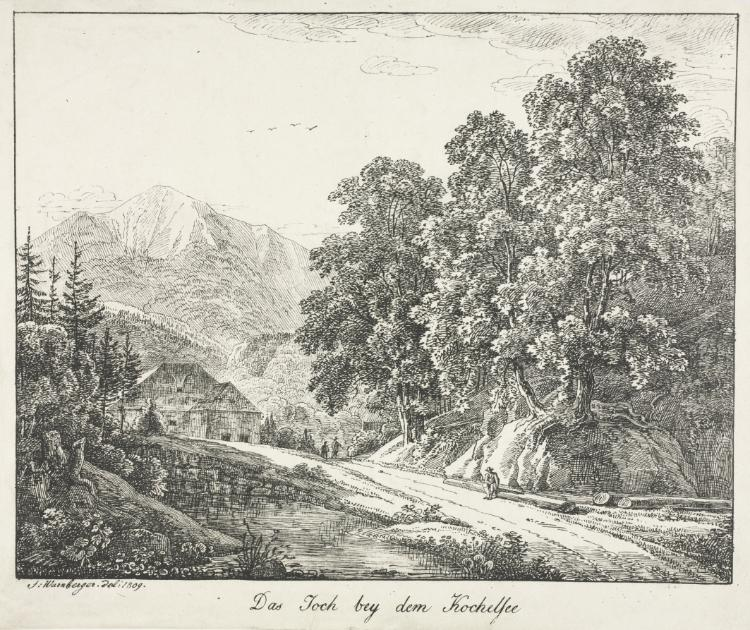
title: The Path by the Kochelsee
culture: Germany, 19th century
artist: Simon Warnberger (German, 1769–1847)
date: 1809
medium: lithograph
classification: Print